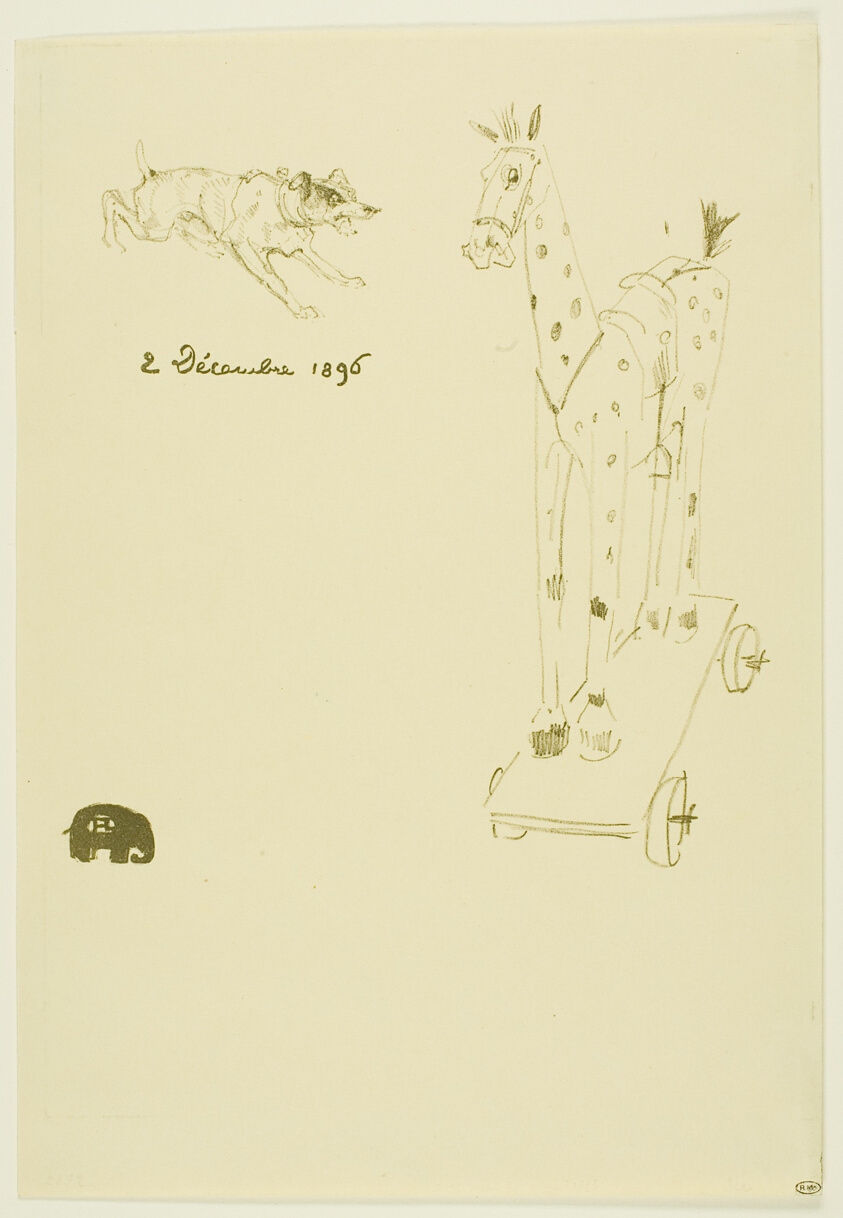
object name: Print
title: Menu Sylvain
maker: Henri de Toulouse-Lautrec (French, 1864-1901)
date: 1896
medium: Color lithograph on cream wove paper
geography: France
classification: lithograph; print; prints and drawing